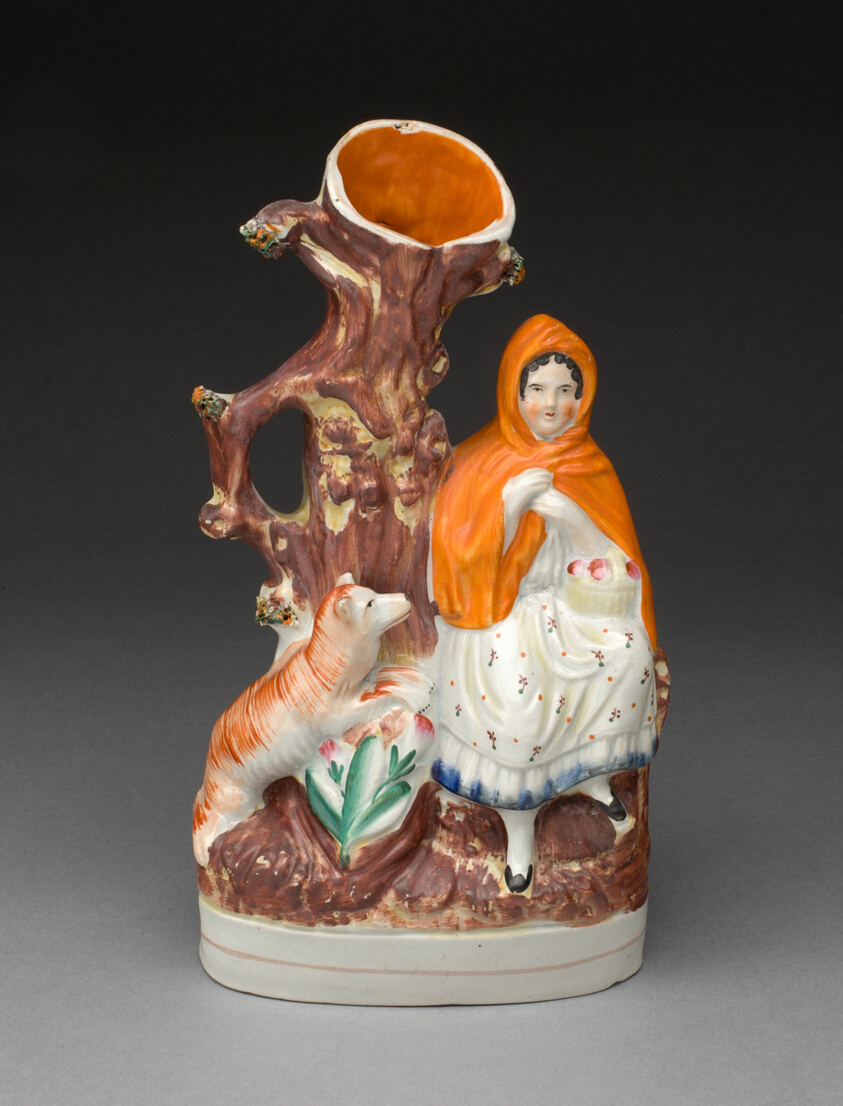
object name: Ceramics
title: Chimney Ornament: Little Red Riding Hood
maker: England, Staffordshire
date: c. 1830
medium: Glazed earthenware with polychrome enamel decoration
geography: Staffordshire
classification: ceramics; european decorative arts